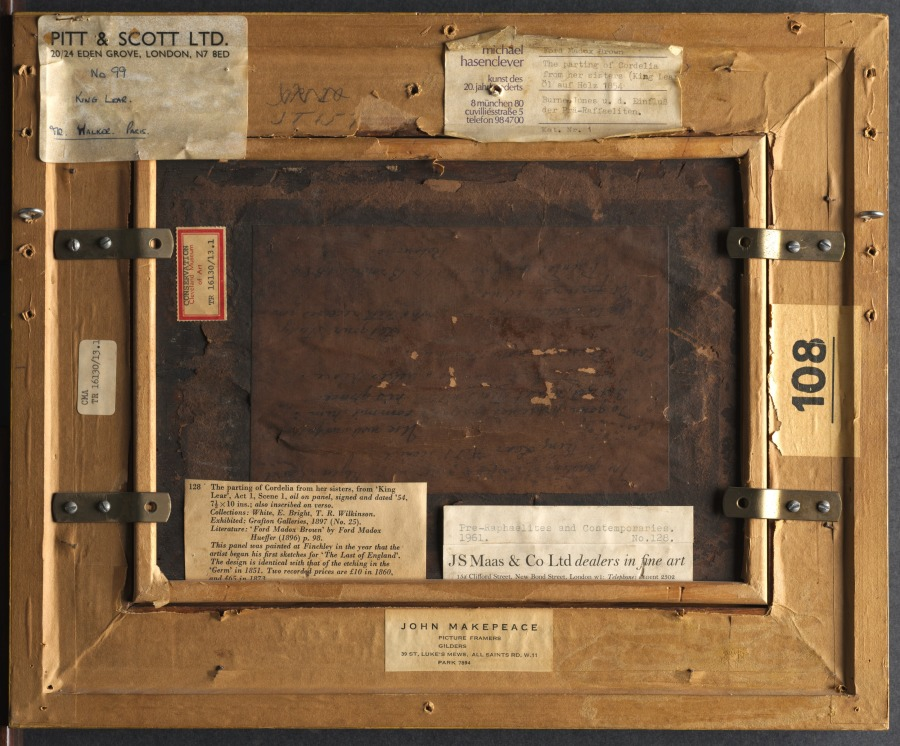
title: Cordelia Parting from her Sisters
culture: England, 19th century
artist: Ford Madox Brown (British, 1821–1893)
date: 1854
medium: pen and oil on paper on panel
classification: Painting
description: Reimagining English history was one way that Victorian (1837–1901) artists rooted themselves during a period of tremendous social and political change and life-altering technological advances. Ford Madox Brown’s expressive and vividly colored sketch for an unrealized project takes a story from Britain’s most famous playwright, Shakespeare. The artist chooses the dramatic moment when King Lear’s daughter Cordelia parts ways with her sisters.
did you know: In 1861, Ford Madox Brown became a founding member of William Morris’s decorative arts company. Besides painting, he also designed stained glass and furniture.